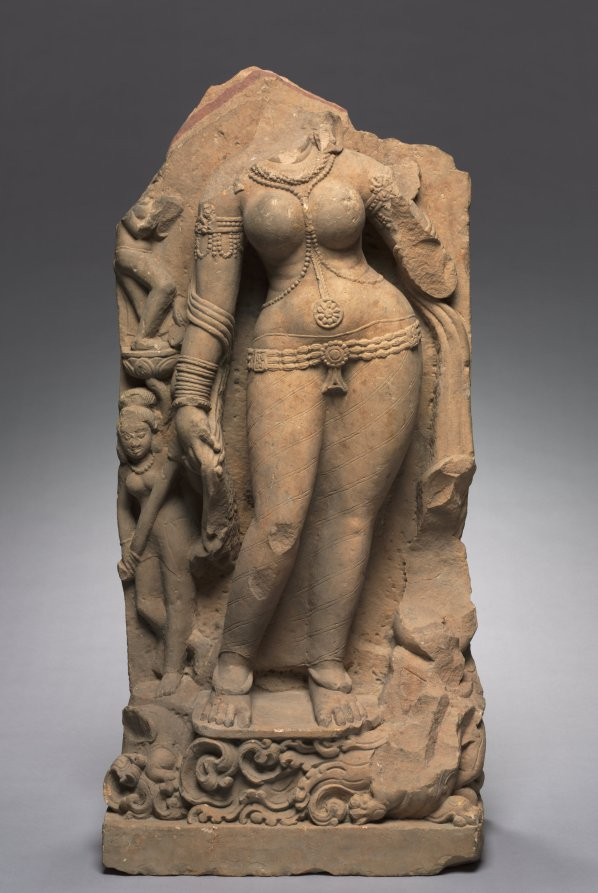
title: River Goddess Ganga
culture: Northern India, Uttar Pradesh, Mathura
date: c. 700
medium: sandstone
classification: Sculpture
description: The Ganges River that runs from the Himalaya Mountains east to the Bay of Bengal is India's most sacred river. Hindu myths tell of how the god Shiva held out a lock of his hair to catch the fall of the heavenly river, identified with the Milky Way, so that it would trickle gently to earth. The river is personified as the goddess Ganga, and since she flows eternally through the hair of Shiva, the river is considered holy. Sculptures of Ganga were placed at the doorway of temples, for the image of the purifying waters symbolically cleanses those who enter the sacred space. She stands on a crocodile-like creature called makara, here shown with a fancifully foliated tail.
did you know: The vein of red sandstone visible in the broken top locates the source as a quarry near Mathura.